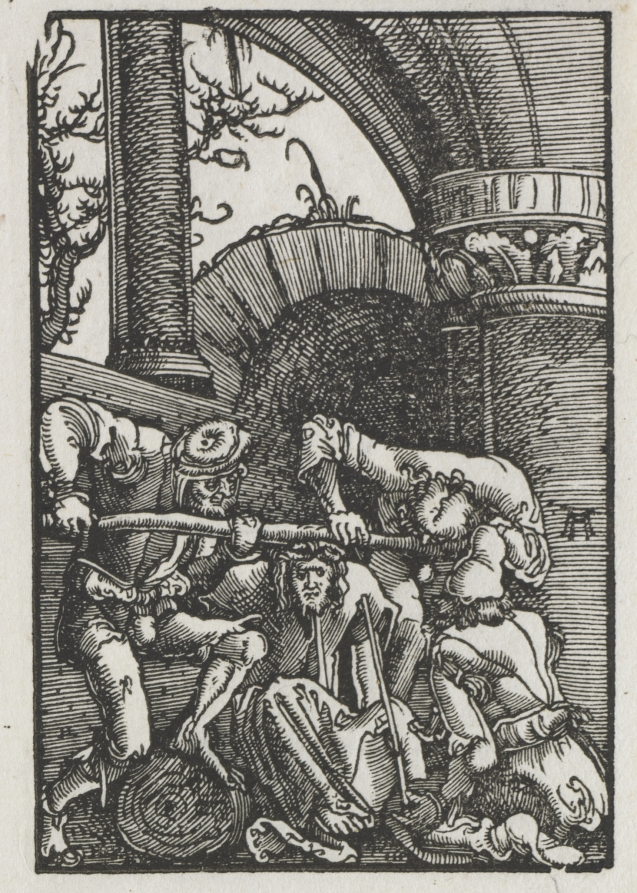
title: The Fall and Redemption of Man: Christ Crowned with Thorns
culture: Germany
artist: Albrecht Altdorfer (German, c. 1480–1538)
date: c. 1515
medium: woodcut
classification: Print